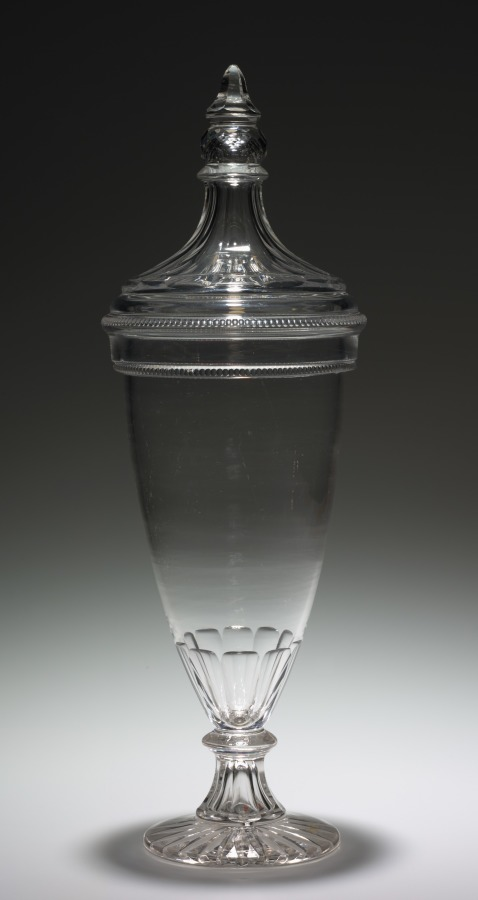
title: Candy Jar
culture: America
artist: firm of Christian Dorflinger (American, 1828–1915)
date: 1869–1880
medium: glass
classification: Glass